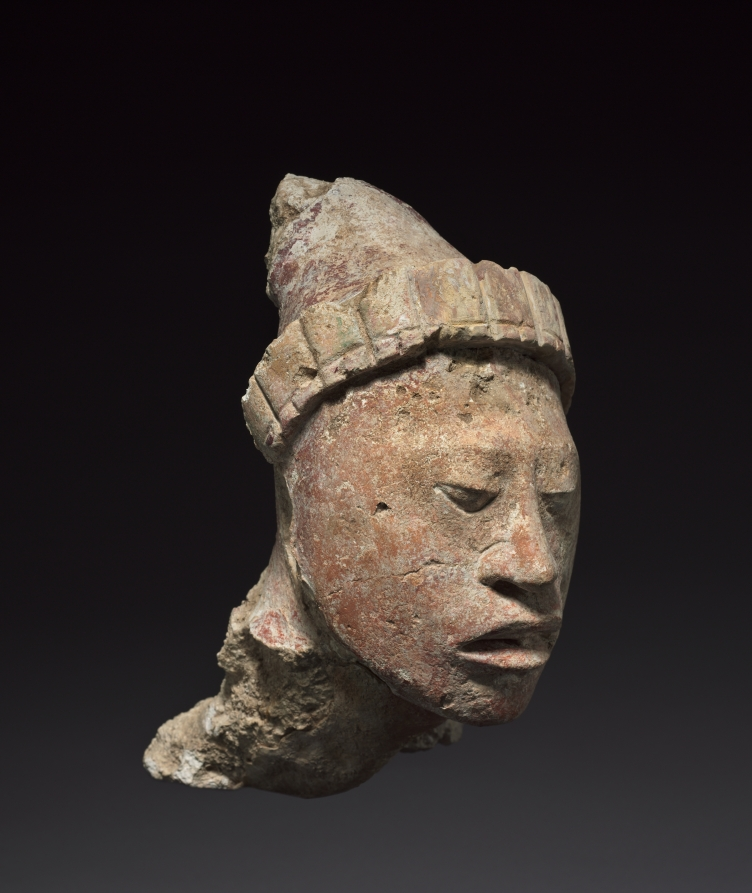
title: Head from a Building's Façade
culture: Mexico, Campeche, Maya style (250-900)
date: 250–900 CE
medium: stucco, paint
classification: Sculpture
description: The Maya often lavishly decorated the exteriors of buildings, transforming them into elaborate sculptural works in their own right. This sensitively modeled head, made from fragile stucco, would have been affixed to the façade of a palace or temple via the tenon (projection) at the back of the head. The rest of the body may have been modeled separately.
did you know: Maya elites practiced cranial modification on infants to achieve the sloped profile seen in this tenoned head.